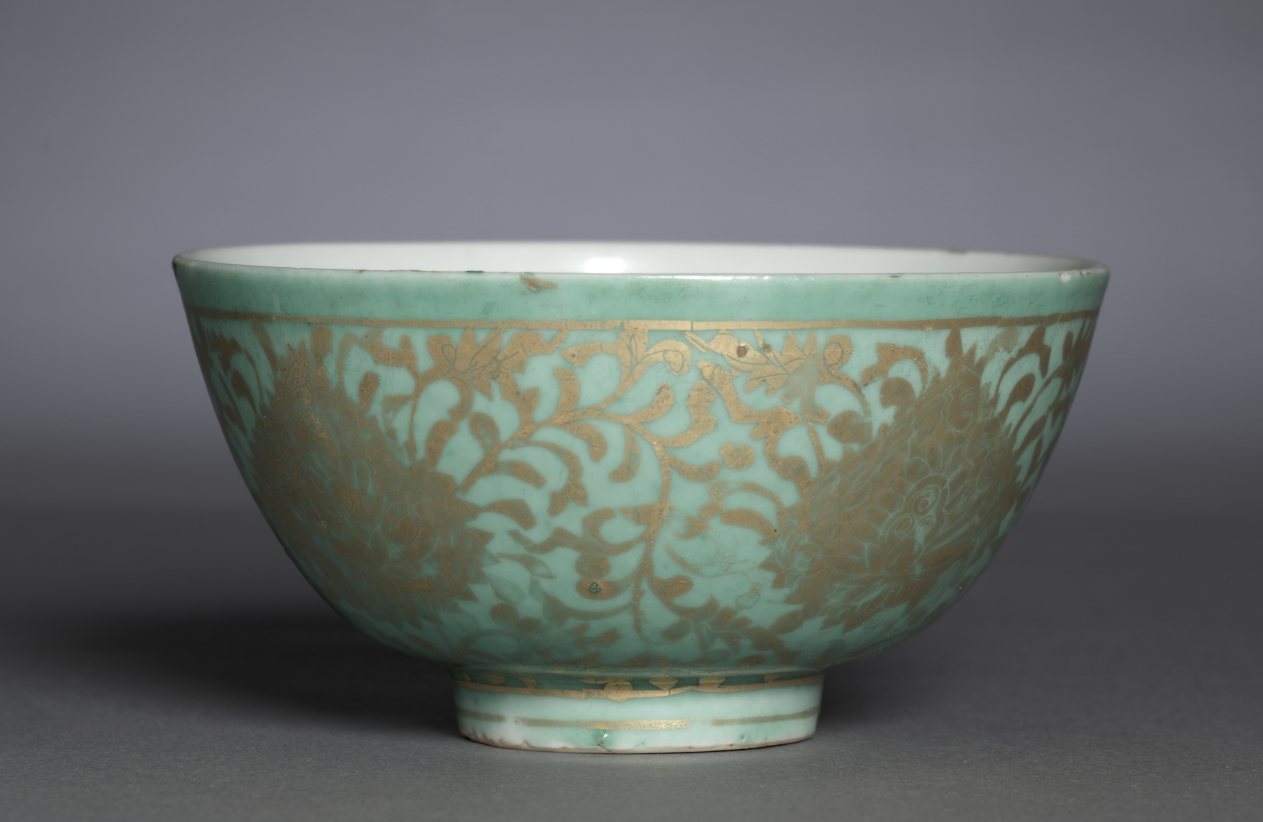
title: Bowl with Lotus Scrolls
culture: China, Jiangxi Province, Jingdezhen kilns, Ming dynasty (1368–1644)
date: 1500s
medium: porcelain with burnished and engraved gold (kinrande) decoration on green overglaze enamel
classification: Ceramic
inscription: Fine vessel for the rich and honorable (fugui jiaqi)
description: Bowl such as this, with kinrande (gold-engraved) decoration over monochrome enamels, may have been made originally for export to Japan. On the base of this bowl are an underglaze blue inscription, reading "Fine vessel for the rich and honorable (fugui jiaqi)," as well as a modern registration mark "PDF A552" to indicate that it was formerly in the Sir Percival David collection in London. A similar kinrande bowl can be found in the Percival David Foundation, PDF A549.